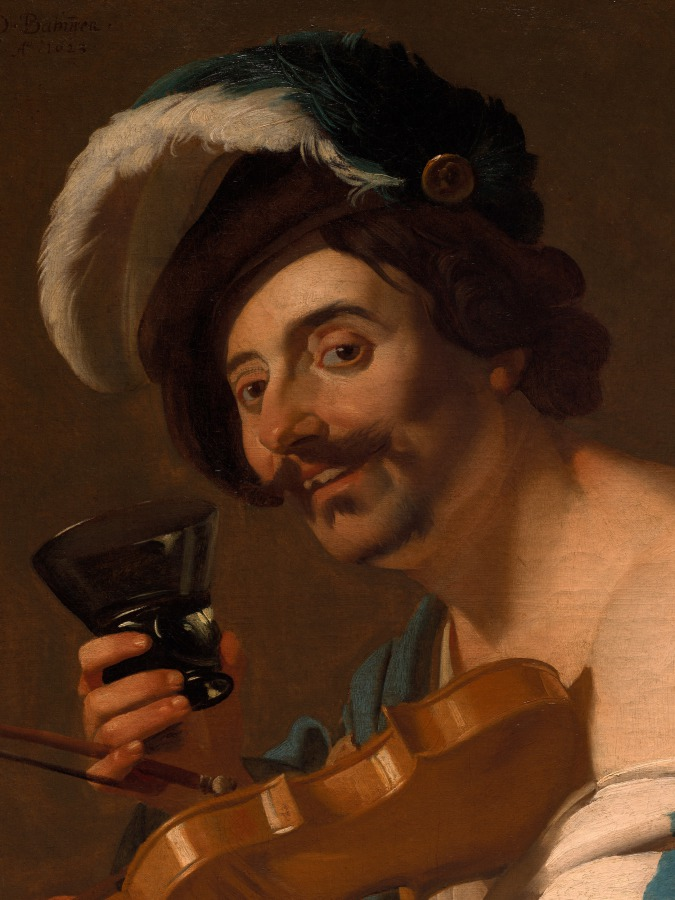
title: Violin Player with a Wine Glass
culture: Netherlands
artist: Dirck van Baburen (Dutch, c. 1595–1624)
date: 1623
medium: Oil on canvas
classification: Painting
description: Baburen, a native of Utrecht, was among the first to introduce Caravaggio’s revolutionary style to the Netherlands. Half-length figures positioned close to the picture plane project a lively spontaneity. This musician’s loose, colorful dress marks him as a figure at the edges of society, unbound by behavioral norms—associations enhanced by his bold gaze, unshaven face, and cheeky grin complete with broken tooth.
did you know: Other paintings by Utrecht artists feature the same model, whose extravagant mustache and broken tooth make him instantly recognizable.